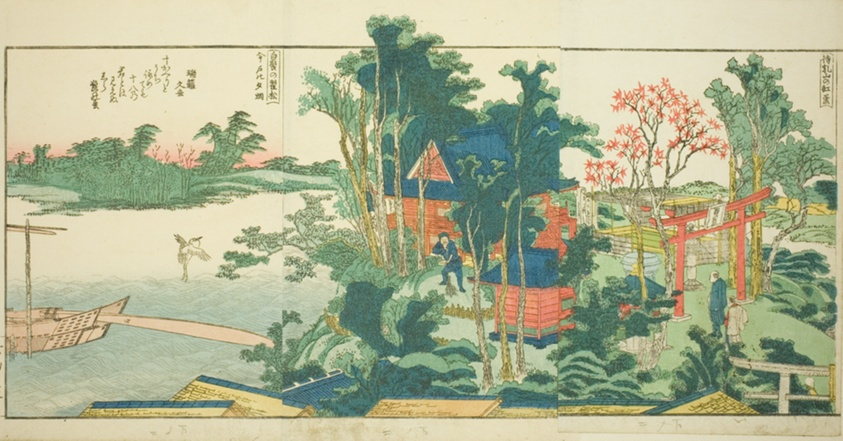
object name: Print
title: Pages from the illustrated book "Panoramic Views along the Banks of the Sumida River (Ehon Sumidagawa ryogan ichiran)"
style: Japanese (culture or style)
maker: Katsushika Hokusai 葛飾 北斎; Japanese, 1760-1849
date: 1801, 1804, or 1806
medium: Color woodblock print; 3 pages from illustrated book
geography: Japan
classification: woodblock print; print; asian art